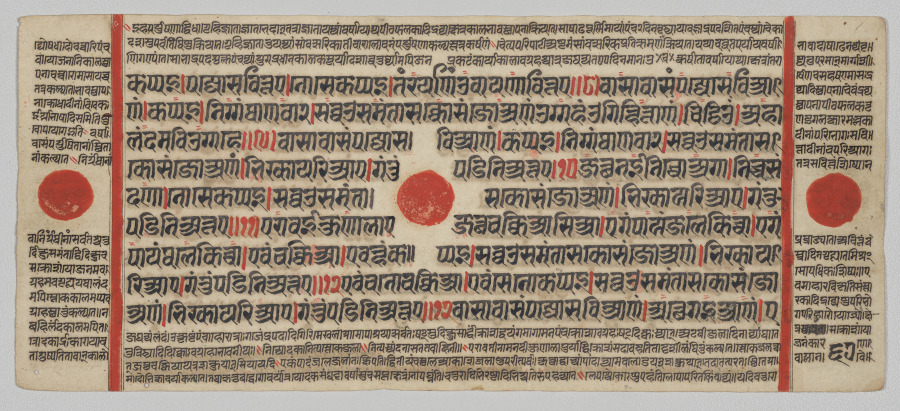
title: Text, Folio 67 (verso), from a Kalpa-sutra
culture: Western India, Gujarat, last quarter of the 15th century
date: c. 1475–1500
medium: Gum tempera, ink, and gold on paper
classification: Painting